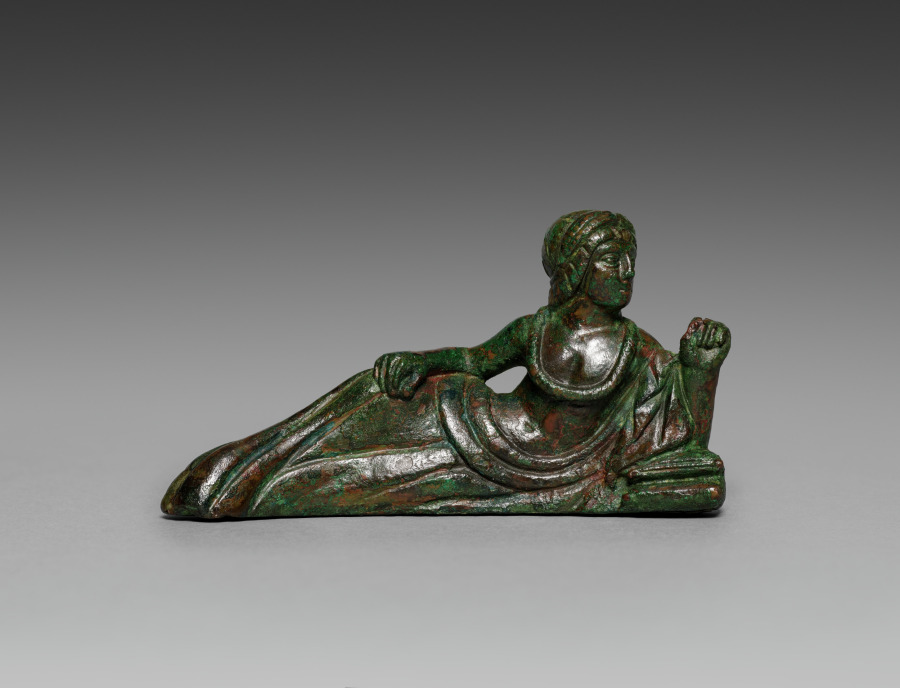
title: Vessel Ornament of Banqueter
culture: Etruscan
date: probably 400–375 BCE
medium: bronze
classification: Sculpture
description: This bronze banqueter figurine was one of six once adorning the rim of a large basin, now lost. Cast in molds with individualized details, most have grooves on their underside to attach to the basin. Minute traces of gilding remain on areas of clothing and skin (mostly visible only under magnification), suggesting that they may have been completely gilded. Two handles in the form of hippocampi, horses with serpentine tails, also belonged to the basin and are now displayed at the Michael C. Carlos Museum at Emory University. The basin may have been used to hold liquid for a banquet, or was perhaps funerary. This banqueter tilts his head toward his left hand, which may have once held an object, now lost. His right arm rests on his hip. Unlike the other banqueters, this figurine does not have exposed feet and his body curves slightly when viewed from above. This suggests that this figurine may have been made for a different initial use before being added to this set.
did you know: The Etruscan banquet shared similarities with the Greek symposium where guests reclined and drank wine.